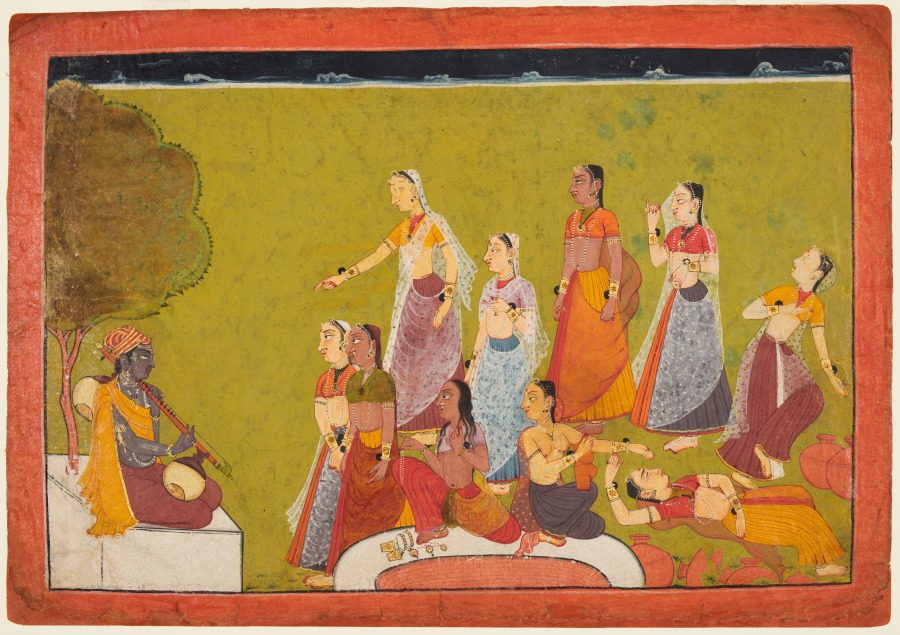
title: A group of women in ecstasy before Madhava, folio 4 from a Madhavanala-Kamakandala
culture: Northern India, Pahari kingdoms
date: c. 1720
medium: gum tempera and gold on paper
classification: Painting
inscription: Takri number: 4; Roman numeral: X-K. Ishwari Singh of Sirmur; number 189. sorathā. thakī jaraṃga nī jahī sunata nāda bisa mādha bhaī. tisatī thakī gahī gayī kāma kamī dhucadhā imano. caupai. ika trīya murachī bhumī para paraī. ika trīya gīrata ardharadhara dharaī. ek nena so nena mīlave. taji sara eka nikata calī āve. ek na paharete cīra sambhārā. vyākala bhaī chutī gaye barā. ekana bhūkhana dhare utārī. ekana taji kancukī sārī. eka nārī calī uthī saṃgā. jaise dhūnī munī cale kuraṃga. doha. kāma dhukha sara paṃca le mārī trīha tī sīṭhaī. mādhavanala mohi save saṃga pāraī kī naī.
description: The raptures of Madhava’s audience intensify. As he plays, the music becomes increasingly climactic. Several women stand immobilized; others make emotive gestures. Some faint, while others feel compelled to remove their clothes and jewelry. Written by a Sufi Muslim poet embracing mysticism, the story shows how devotees should feel toward Allah, god of Islam. In the Hindu courts of Pahari India, however, the story provided entertainment for the educated elite. The women’s ecstasies can also be viewed in the context of the Hindu devotional movement (bhakti), characterized by using poetry and art to stir a sense of erotic love for Krishna or Rama.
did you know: Mesmerized women sitting by the well are removing their jewelry.